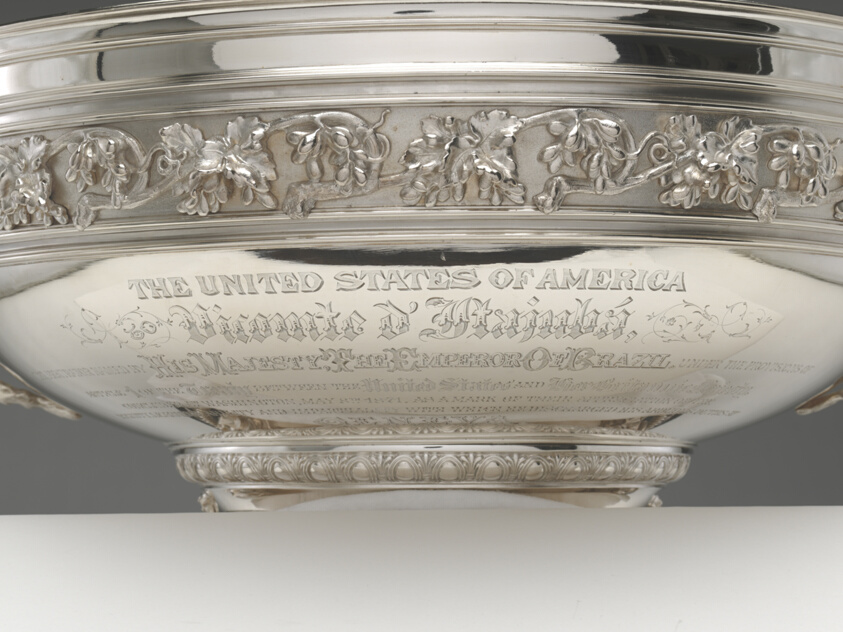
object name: Metalwork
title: Punch Bowl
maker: Chased by Eugene J. Soligny (American, c. 1833–1901); Tiffany and Company (American, founded 1837); New York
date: 1873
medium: Silver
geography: New York City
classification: punch bowl; silver; american decorative arts; american arts; decorative arts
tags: dining, drinking